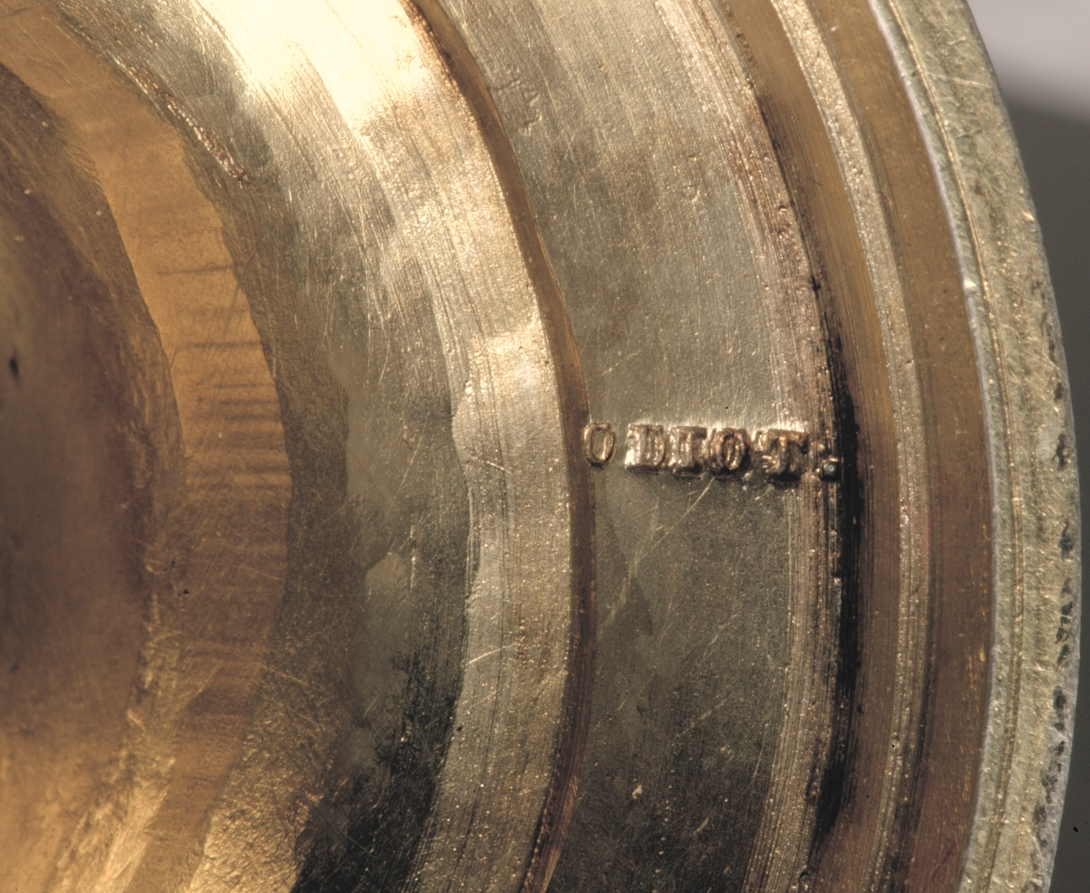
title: Ewer (aiguière)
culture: France, 19th century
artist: Jean Baptiste Claude Odiot (French)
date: c. 1817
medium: silver gilt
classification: Silver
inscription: [Excise mark for medium-sized work, Paris, 1809-1819, on edge of base]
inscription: [Two maker's marks of Jean-Baptiste-Claude Odiot after the Revolution, inside foot]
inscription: [Official assay mark for first standard silver, Paris, 1809-1819, near exterior upper rim]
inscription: [Applied coat of arms of the count Alfred de la Chapelle, Seigneur of Morton and Beaulieu, Périgord “accolé” with an alternate version of de la Chapelle, exterior of foot]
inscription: [Struck twice, interior foot]: "ODIOT"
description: Jean-Baptiste-Claude Odiot’s reputation stretched internationally. Commissioned by Russian count Nikolei Demidoff, this ewer was one part of an extensive silver dinner service. Decorated with motifs of classical antiquity, this object’s Greco-Roman silhouette, grape vine frieze, raised mythological figures, and sinuous swan’s neck handle were likely inspired by the designs of Charles Percier and Pierre-François Fontaine, architects of Napoleon I.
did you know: The coat of arms on the foot of this ewer belongs to the count Alfred de la Chapelle who owned this silver dinner service during the second half of the 19th century.